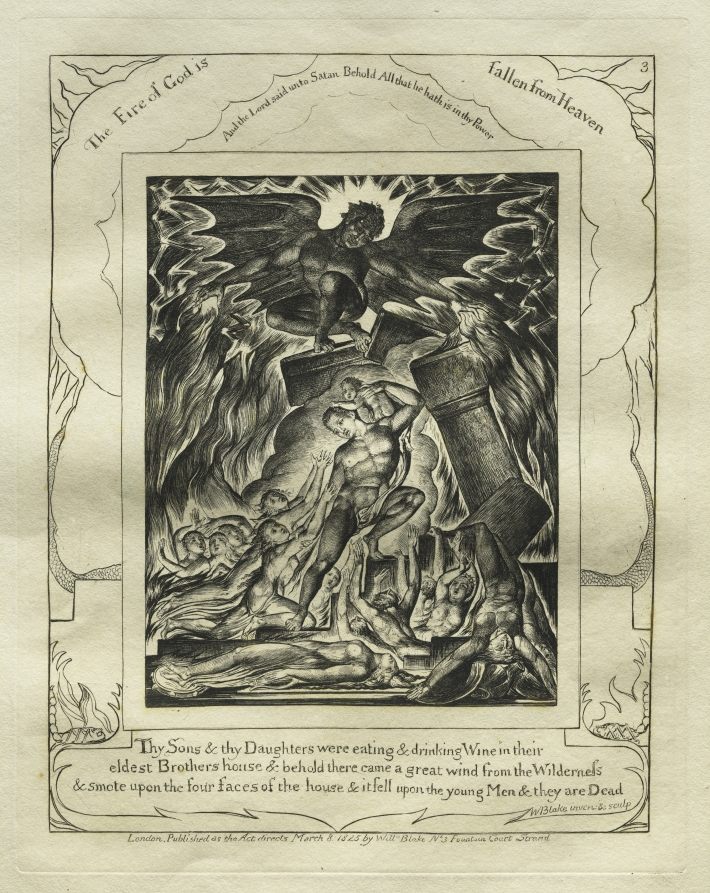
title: The Book of Job: Pl. 3, Thy Sons and thy Daughters were eating and drinking Wine in their / eldest Brothers house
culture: England, 19th century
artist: William Blake (British, 1757–1827)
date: 1825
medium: engraving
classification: Print